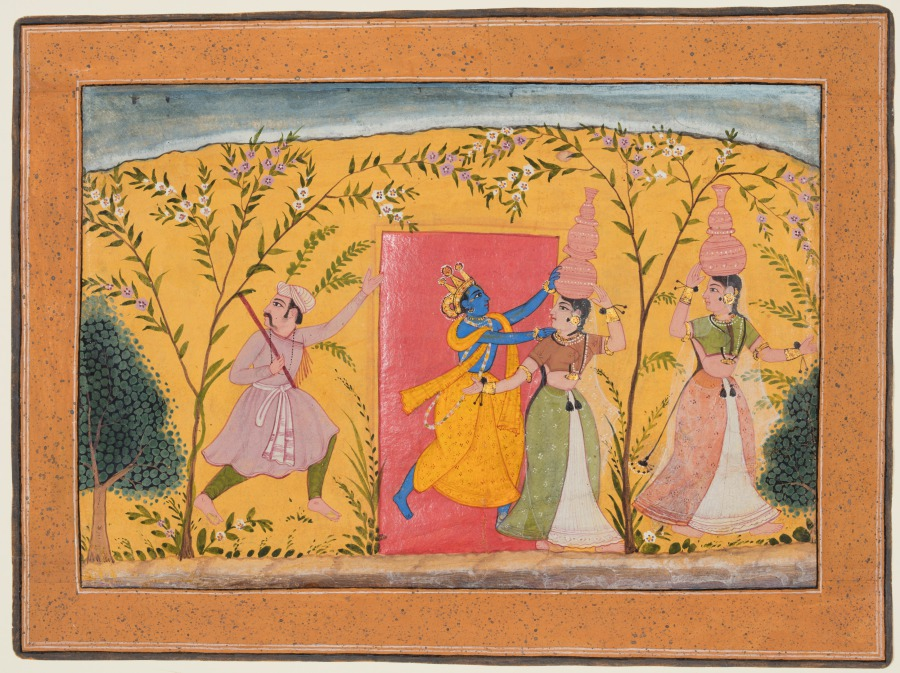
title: Krishna Exacts a Toll from the Milkmaids: Dana-Lila, from a Bhagavata Purana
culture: Northwestern India, Rajasthan, Rajput Kingdom of Bikaner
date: c. 1600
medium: gum tempera and gold on paper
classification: Painting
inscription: naṃdalīlā dānalīlā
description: Krishna can be seen here teasing the girls who bring pots of milk and yogurt to the Brahmin priests. Thinking it a waste of time to feed the Brahmins, Krishna waylays them, pretending to be the owner of the land where they are walking. He threatens to topple their pots if they don’t pay him a toll. An exasperated cow herder follows.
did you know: A red quadrangle offsets the blue-skinned god Krishna.